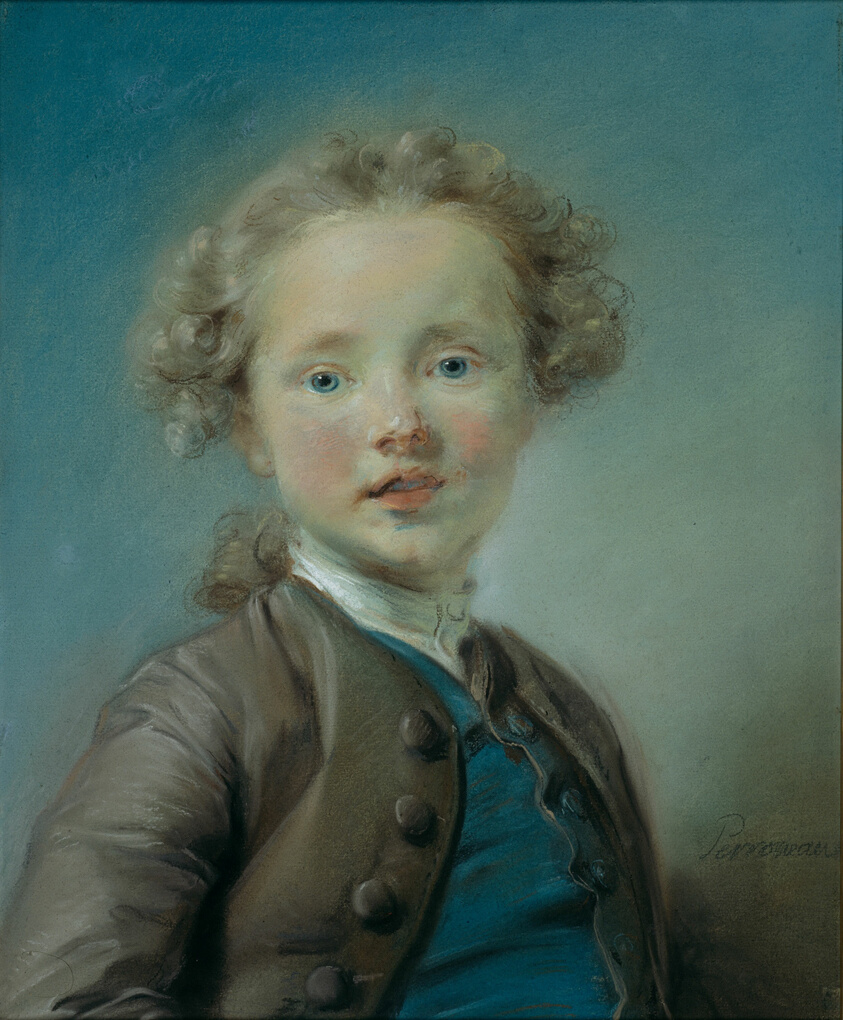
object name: Drawing and Watercolor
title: Portrait of a Young Boy with Blue Eyes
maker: Jean-Baptiste Perronneau (French, 1715-1783)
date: c. 1750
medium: Pastel on blue laid paper, laid down on fabric, stretched on a wooden stretcher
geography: France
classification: pastel; drawings (visual works); prints and drawing